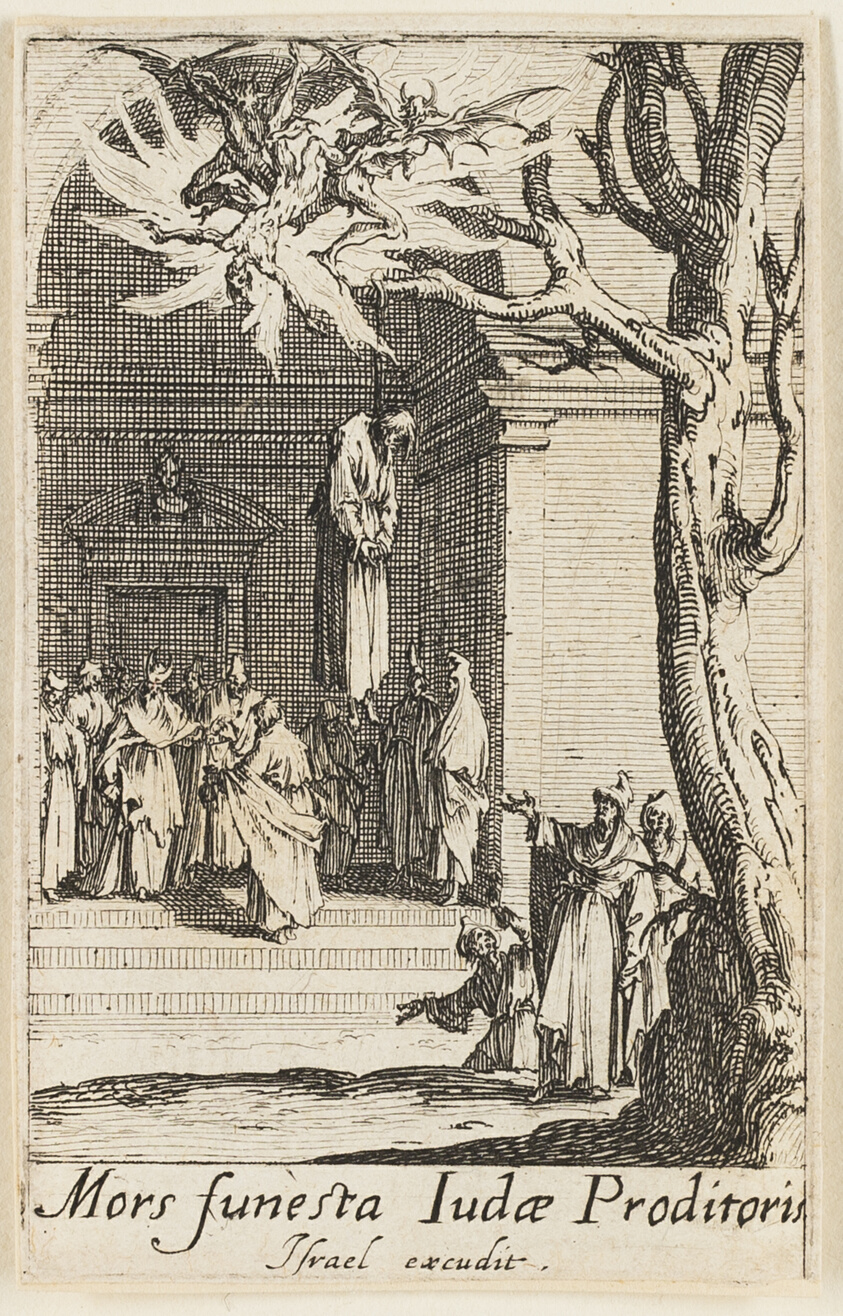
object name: Print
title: Death of Judas, plate fourteen from The Martyrdoms of the Apostles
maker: Jacques Callot (French, 1592-1635)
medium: Etching on paper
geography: France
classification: etching; print; prints and drawing